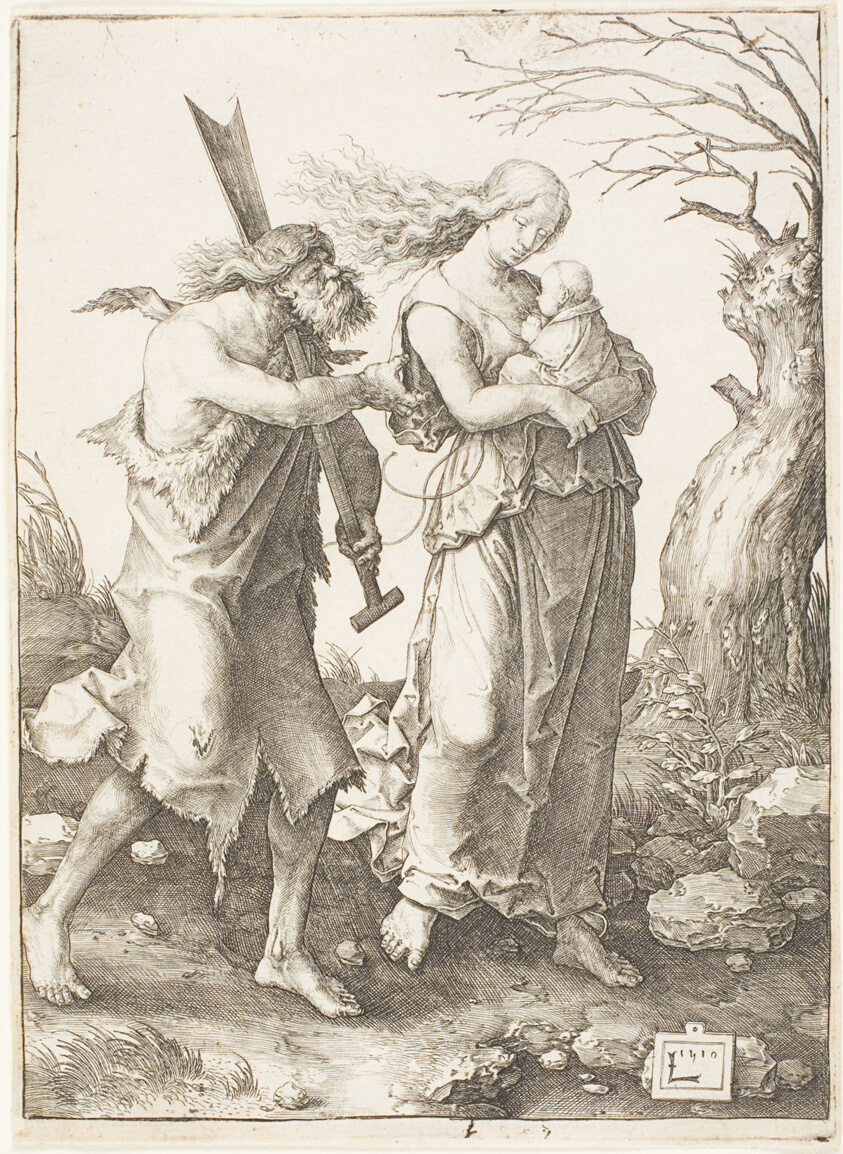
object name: Print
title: The Expulsion from Paradise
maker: Lucas van Leyden (Netherlandish, c. 1494-1533)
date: 1510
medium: Engraving in black on ivory laid paper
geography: Netherlands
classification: engraving; print; prints and drawing